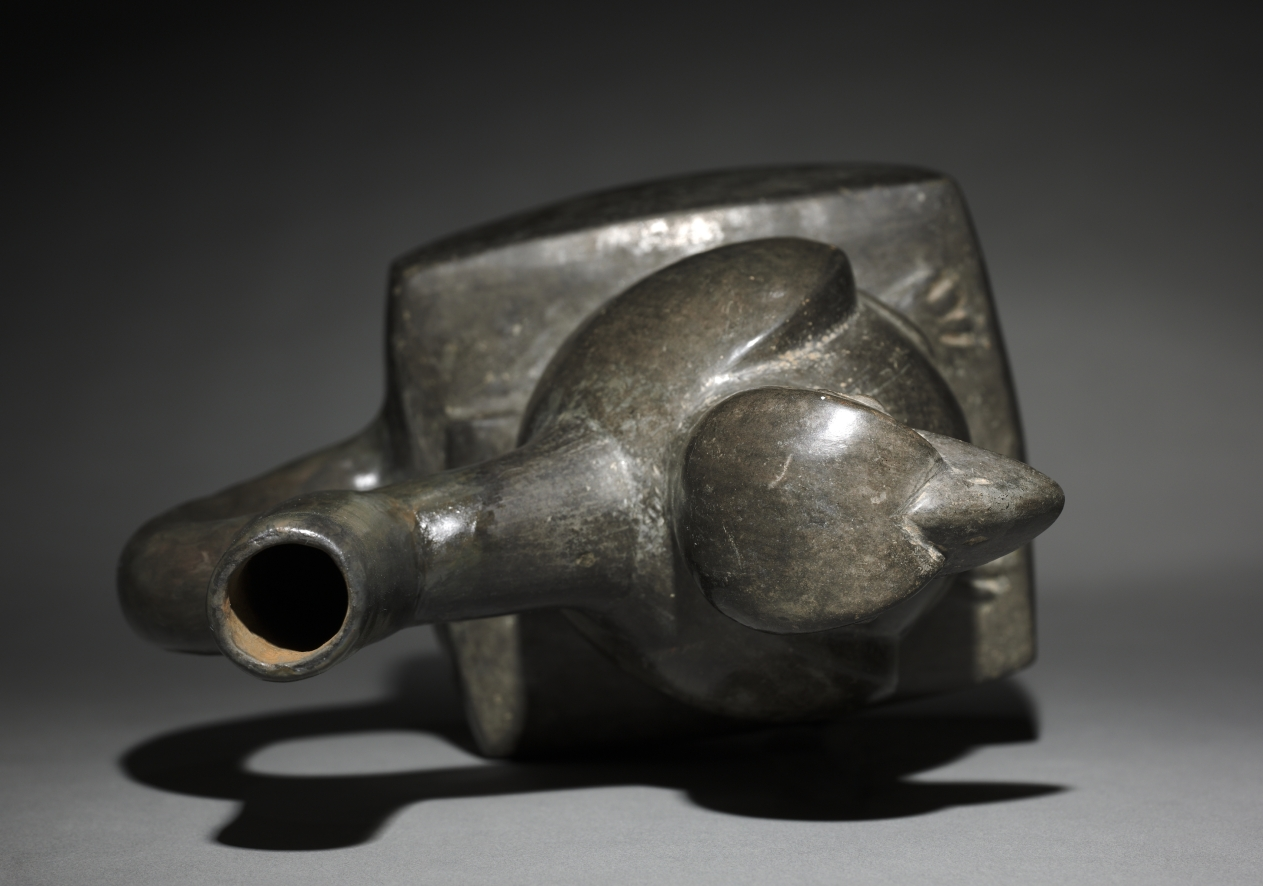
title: Darkware Vessel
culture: Peru, North Coast, Chimú style (900-1470)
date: 900–1470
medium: black ware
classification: Ceramic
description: Under the Chimú, ceramic seems to have been a less important artistic medium than for earlier north coast cultures. Accordingly, ceramics were mass produced with molds and, rather than bearing painted scenes, often have an overall dark surface achieved by firing in a smoky atmosphere.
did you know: Chimú potters fired their vessels in a reduced-oxygen atmosphere to achieve a uniform black surface.